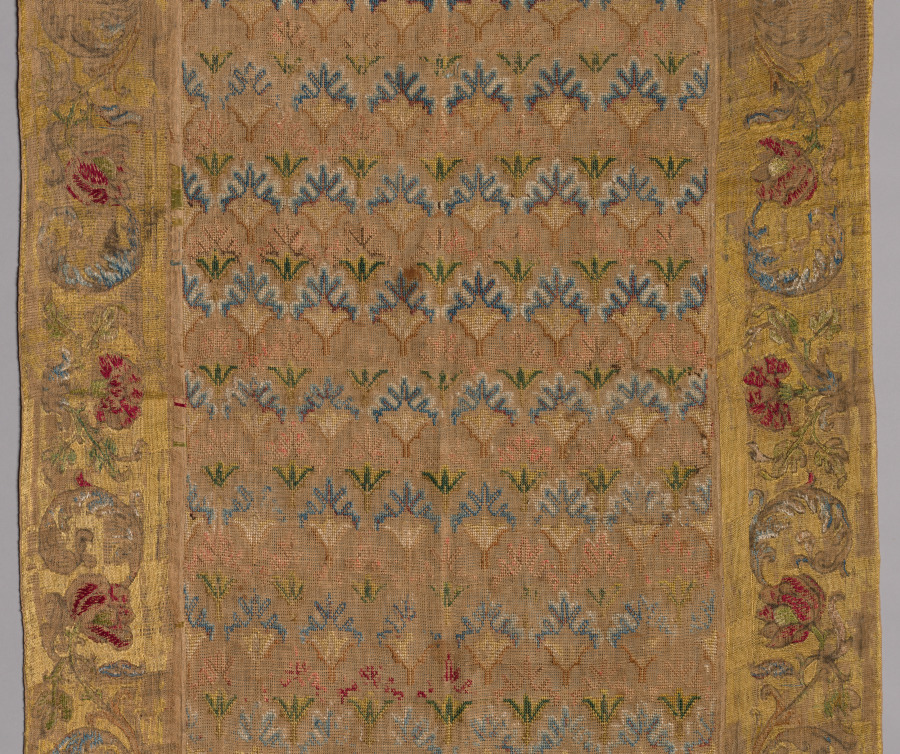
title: Embroidered Panel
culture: Italy, 17th century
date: 1600s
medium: embroidery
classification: Embroidery